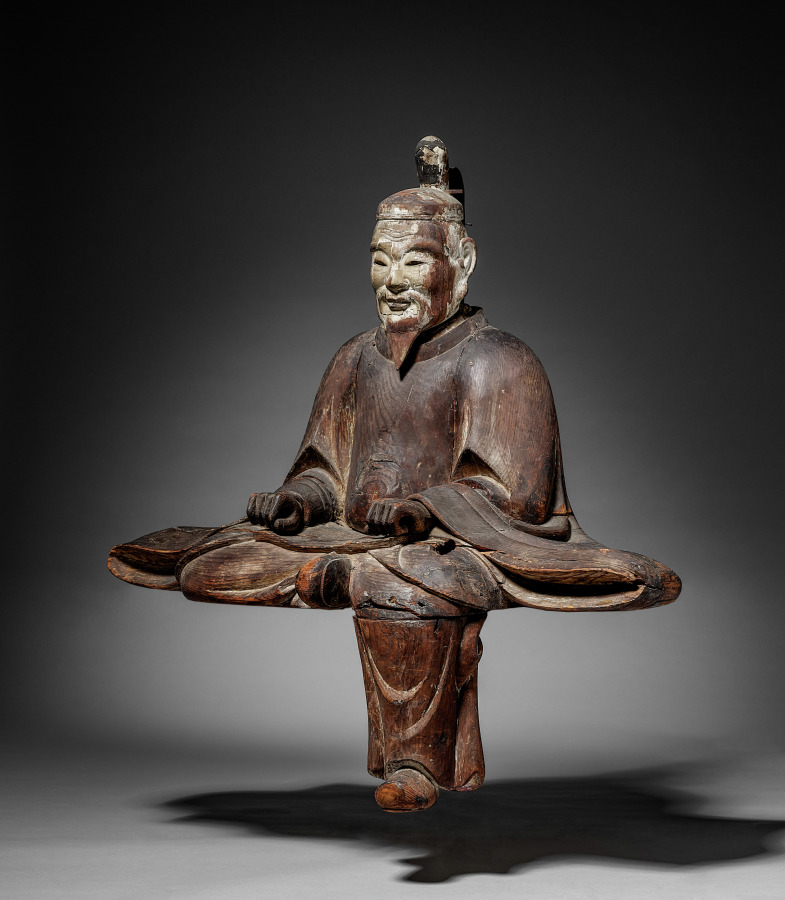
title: One of a Pair of Guardian Figures (Zuishin)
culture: Japan, Muromachi period (1392–1573) to Edo period (1615–1858)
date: c. 1560–1625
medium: Japanese cypress (hinoki) with traces of color; crystal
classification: Sculpture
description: Sculptors carved these two figures to look like members of the guard who protected the Japanese aristocracy in the 10th to 12th centuries. The pair belong in the roofed gate of a Shinto shrine. Their role was to embody the divine protectors of the deities, or kami, residing at the shrine. Their inset crystal eyes make them appear vigilant.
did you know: Some Japanese sculptors used to specialize in inset crystal eyes.